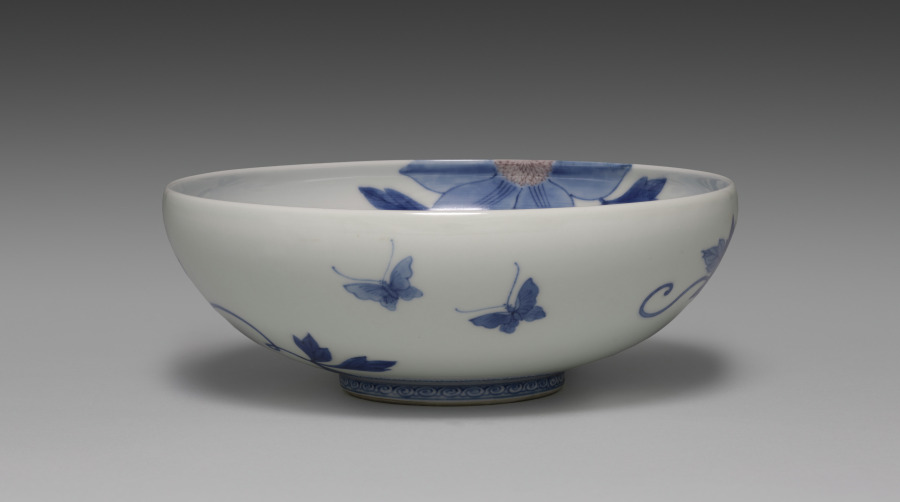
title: Dining Bowl with Clematis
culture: Japan, Meiji period (1868–1912)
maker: Seifū Yohei III (Japanese, 1851–1914)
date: 1893–97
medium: Porcelain with underglaze and overglaze colors, molded and incised designs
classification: Ceramic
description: The bowl is an especially well-executed example of Yohei III’s work in underglaze blue combined with other underglaze colors. This low-profile dining bowl has paintings of flowering clematis vines under the glaze in blue and red. Water is depicted with blue in the bottom of the bowl. The lines of white used to show motion on the water’s surface were created using either a reserve technique, where blue was omitted, or a masking technique, where parts of the surface were covered before applying the blue. A pair of butterflies flutters across one side. The foot is decorated with a pattern of spirals in blue, and the lip curves in slightly. The overall effect is one of seeing the flowering vine hanging down, hovering just above the surface of a pond, whose slight disturbances hint at unseen fish swimming below.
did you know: This bowl shows an environment painted in the round.